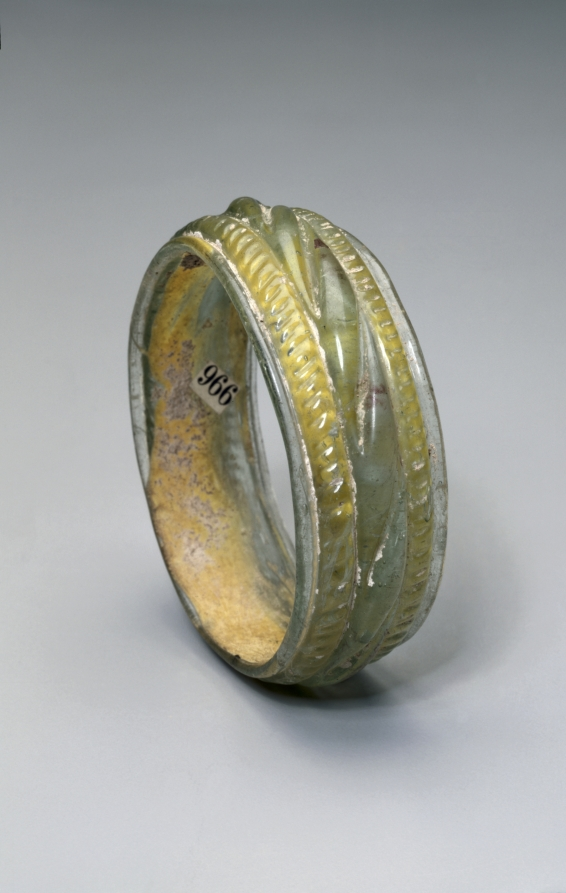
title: Bracelet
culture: Cyprus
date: 100–300 CE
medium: glass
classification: Jewelry